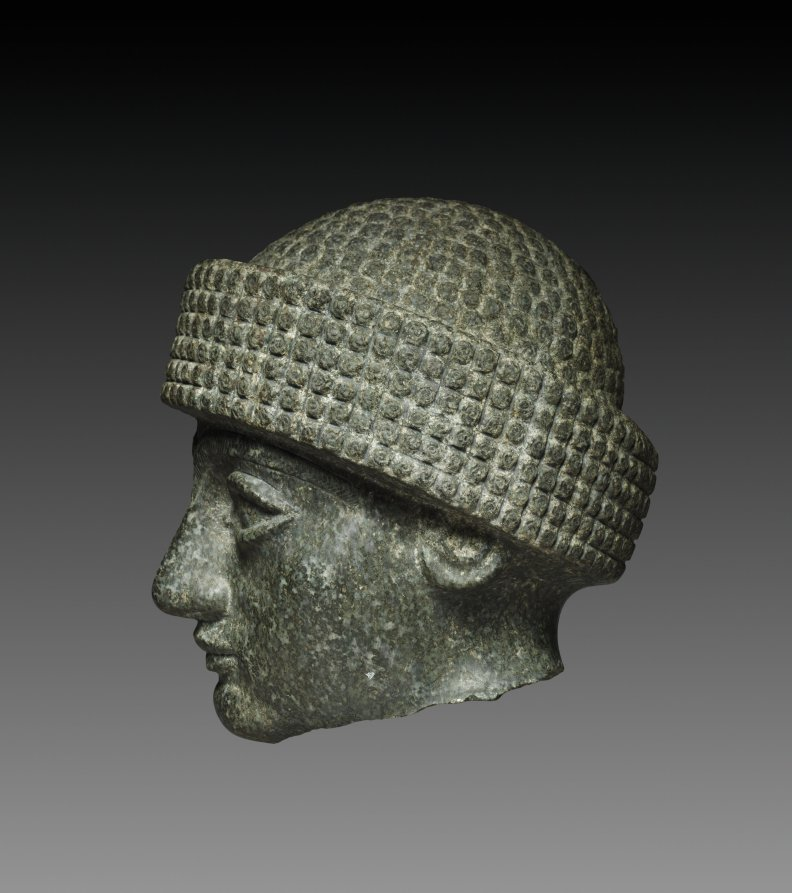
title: Head of Gudea, ensi of Lagash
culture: Mesopotamia, Iraq, Lagash (Tello)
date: 2144–2124 BCE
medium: dolerite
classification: Sculpture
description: Gudea was an ensi or ruler of the southern Mesopotamian city-state of Lagash in the 22nd century BCE. Archaeologists have found over 30 complete and fragmentary statues of his likeness and over 2,400 inscriptions mentioning his name. Gudea was both a political and religious leader, and most of the statues depicting him were housed in temples.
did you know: This head was originally on the body of 1963.154; however, they were separated in 1974 when it was realized they did not belong together.